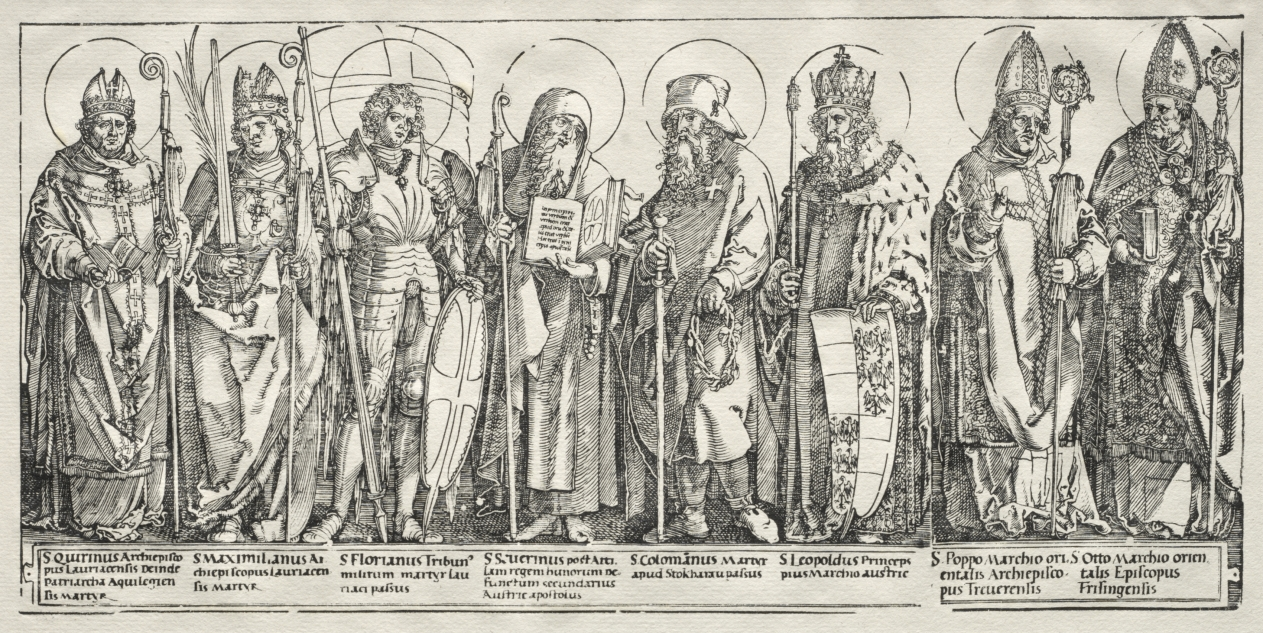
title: The Eight Saints of Austria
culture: Germany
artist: Albrecht Dürer (German, 1471–1528)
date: c. 1515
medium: woodcut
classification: Print